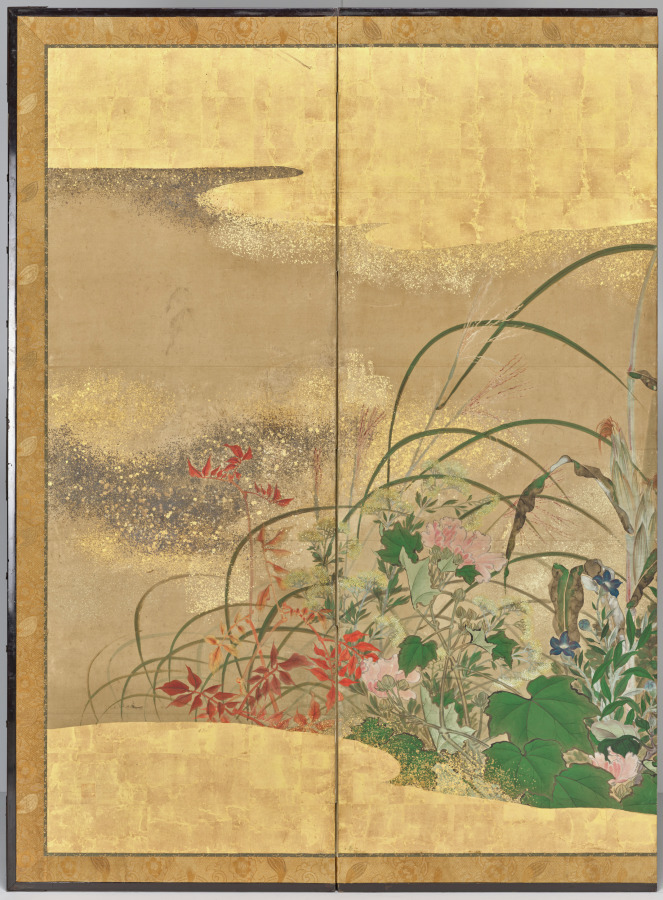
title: Flowers and Trees of the Four Seasons (left screen)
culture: Japan, Edo period (1615–1868)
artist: Watanabe Shikō (Japanese, 1683–1755)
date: early to mid-1700s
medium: Six-panel folding screen; ink, color, gold, silver, and gilding on paper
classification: Painting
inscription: 始興之印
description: The painter Watanabe Shikō had a special interest in scientific realism, based on interactions with his patron Konoe Iehiro. Shikō combined his attention to accurate depiction of plants with strong ink outlines and decorative elements like gold and silver, arriving at an innovative style that influenced many of his peers in the city of Kyoto.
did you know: One plant in these screens, tumeric, or ukon in Japanese, is found in Okinawa.